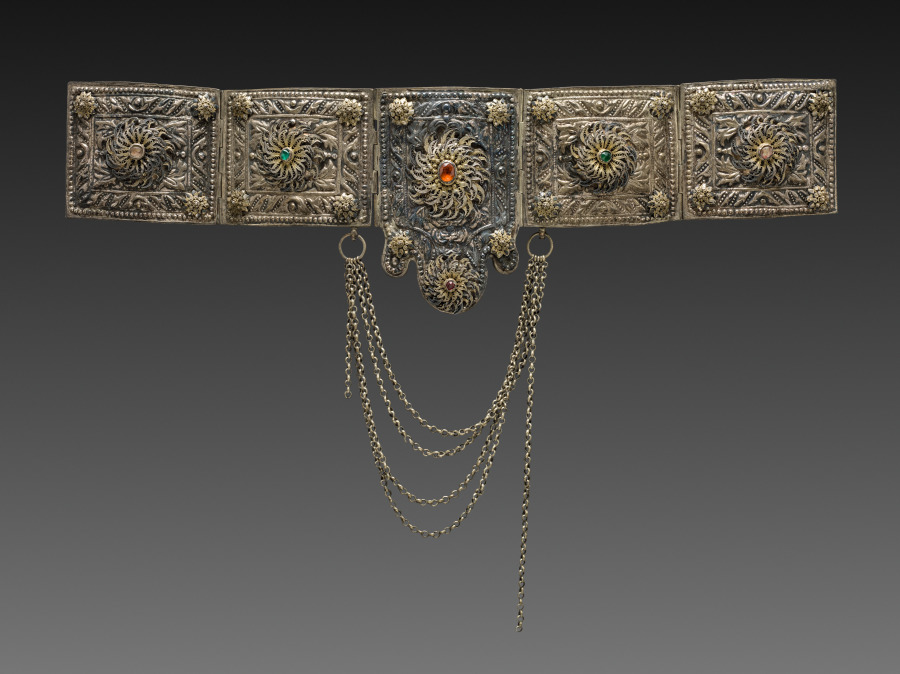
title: Belt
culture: Yugoslavia, Dalmatia, 19th century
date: 1800s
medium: silver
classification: Jewelry